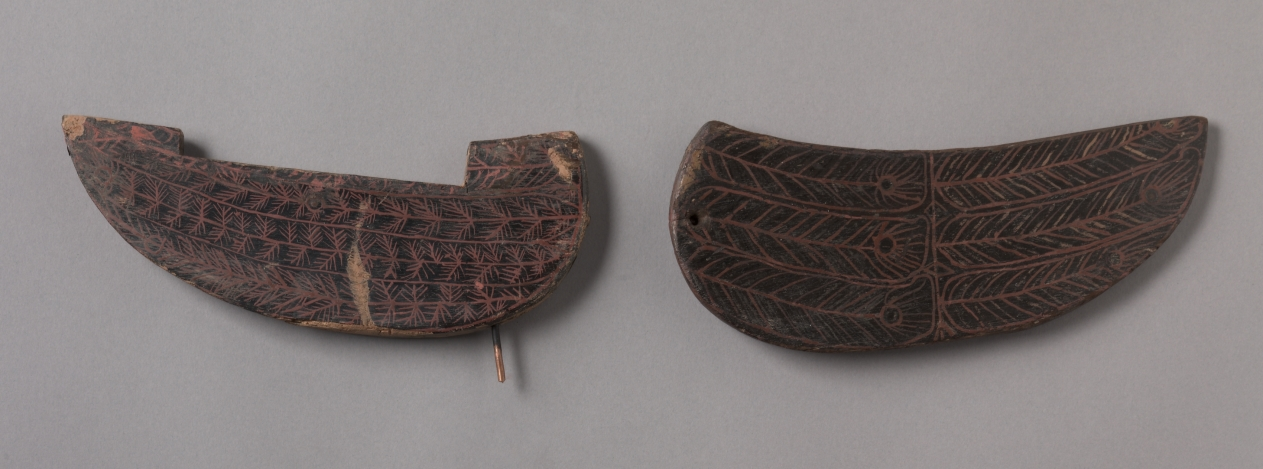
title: Cranes and Serpents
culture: China, reportedly from Hunan province, Changsha, Warring States period (475–221 BCE), State of Chu (c. 1046–223 BCE)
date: 475–221 BCE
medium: lacquered wood with polychromy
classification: Sculpture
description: A different style of ritual art developed in the state of Chu in South China. In addition to bronze vessels, lacquered wood artifacts expanded the repertory of ritual implements. This extraordinary sculpture was probably a drum stand for supporting a suspended drum in ritual ceremonies. It is unique among other excavated drum stands of the Chu, which typically show two birds standing on tigers. The theme of the bird stepping on the serpent was common in the Chu visual culture. Yet the slender proportions and seemingly flimsy structure of this particular set raise the question of whether it was utilitarian or mostly served symbolic functions in the tomb. The birds' and serpents' bodies have designs painted in red lacquer and yellow pigment against the black lacquer. Scientific analyses confirm the additional use of a blue or green pigment that has been discolored over time.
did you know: The cranes' long necks allowed a lightweight drum to be suspended from strings through the beaks, while the densely intertwined snakes provided a weighty base to stabilize the object during musical performances.